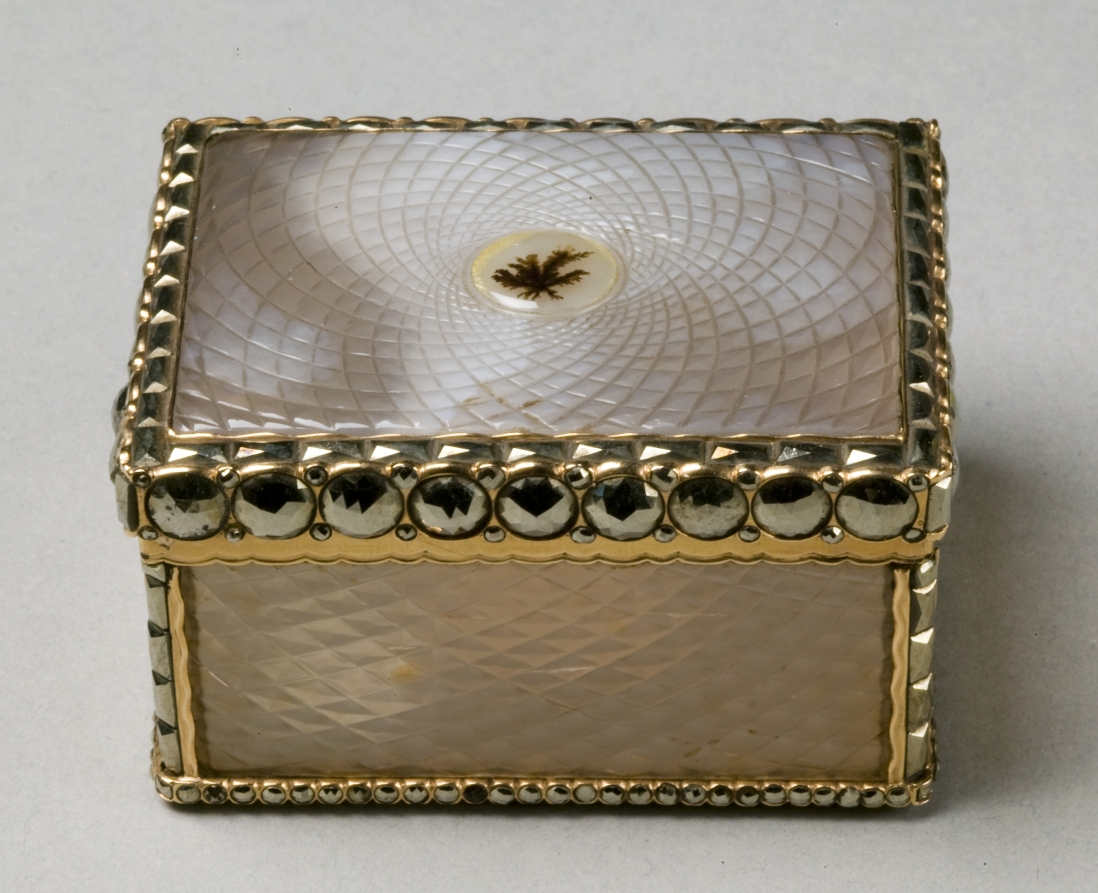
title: Snuff Box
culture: England, London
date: c. 1750–60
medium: gold-mounted agate, engine-turned panels, hematites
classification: Miscellaneous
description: Luxurious personal objects, like this snuff box, were an essential part of a privileged wardrobe during the 1700s and early 1800s, emphasizing their owner’s refinement and wealth. Their glittering surfaces, however, disguised a system based on the labor and suffering of enslaved or indentured people, whether in gold or gemstone mines, tobacco farms, or shops where these goods were made. Like cotton, sugar, and tea, snuff came from British colonies in America, India, and the Caribbean, where enslaved people were exploited to grow these crops under extremely harsh conditions.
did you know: This small, elaborate box held snuff, a form of powdered tobacco that was inhaled in tiny amounts.